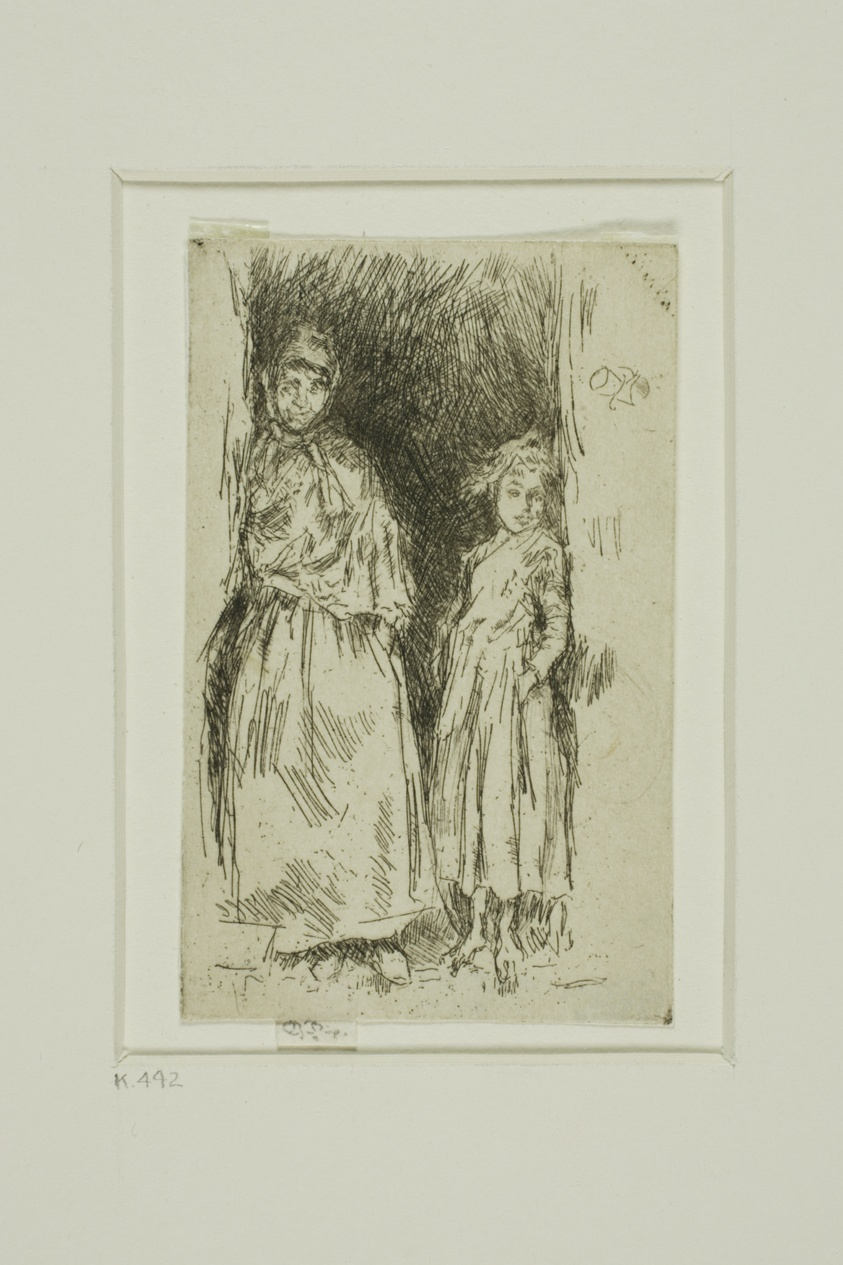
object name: Print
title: Bohemians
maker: James McNeill Whistler (American, 1834-1903)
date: 1901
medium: Etching with foul biting in black ink on ivory laid paper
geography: United States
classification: etching; foul biting; print; prints and drawing; paper